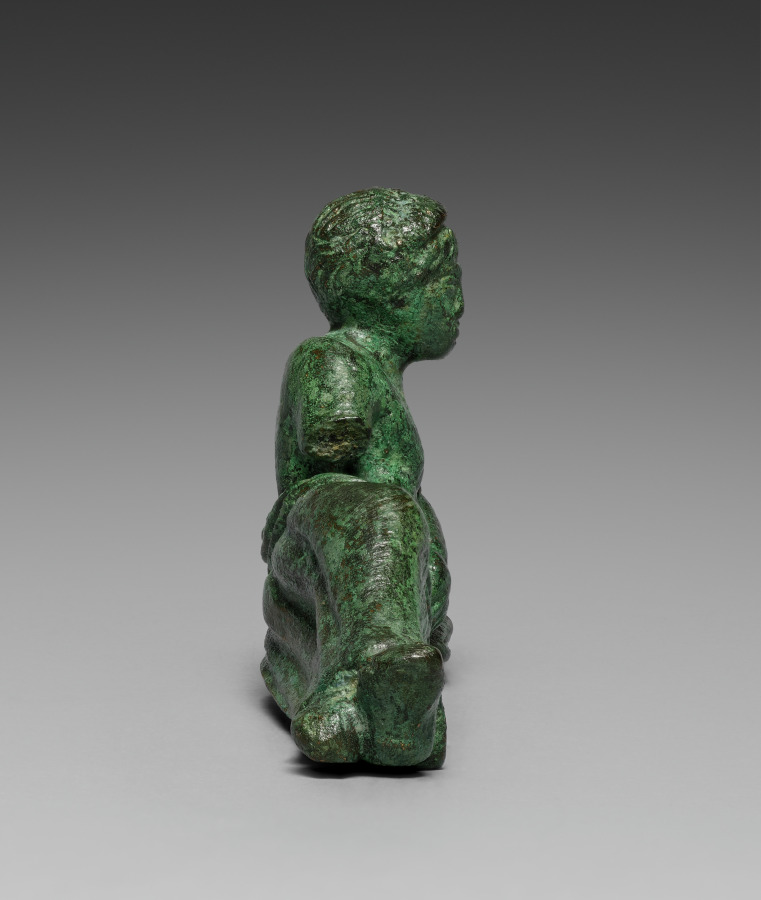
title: Vessel Ornament of Banqueter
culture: Etruscan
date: c. 400–375 BCE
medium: bronze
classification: Sculpture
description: This bronze banqueter figurine was one of six once adorning the rim of a large basin, now lost. Cast in molds with individualized details, most have grooves on their underside to attach to the basin. Minute traces of gilding remain on areas of clothing and skin (mostly visible only under magnification), suggesting that they may have been completely gilded. Two handles in the form of hippocampi, horses with serpentine tails, also belonged to the basin and are now displayed at the Michael C. Carlos Museum at Emory University. The basin may have been used to hold liquid for a banquet, or was perhaps funerary. This bronze figurine lies on his side in the posture of an ancient banqueter. His right arm is broken off but may once have rested on his hip. The figurine wears a garland on his head and a himation draped loosely around his left shoulder, revealing a muscular chest. One leg is raised over the other and a foot is exposed. Specks of gilding remain on the chest and head, but is different in color than that on the other five figurines. Also unlike the others, this one bears a visible seam across its entire length and has no groove underneath.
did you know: This reclining male banqueter demonstrates the posture of symposium guests.